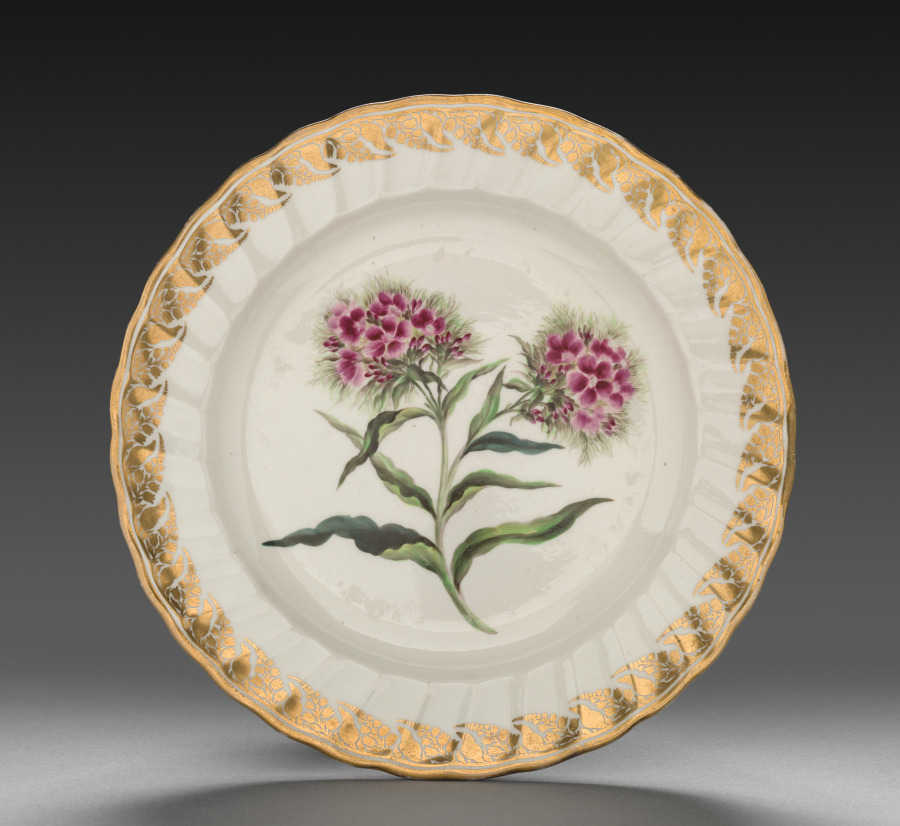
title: Plate from Dessert Service: Sweet William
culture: England, Derby, 18th century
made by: Derby (Crown Derby Period) (British)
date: c. 1800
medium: porcelain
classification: Ceramic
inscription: inscribed in blue on back: Dianthus Barbata./Sweet William./crown/crossed batons and dots/0/115. Near edge: 9.